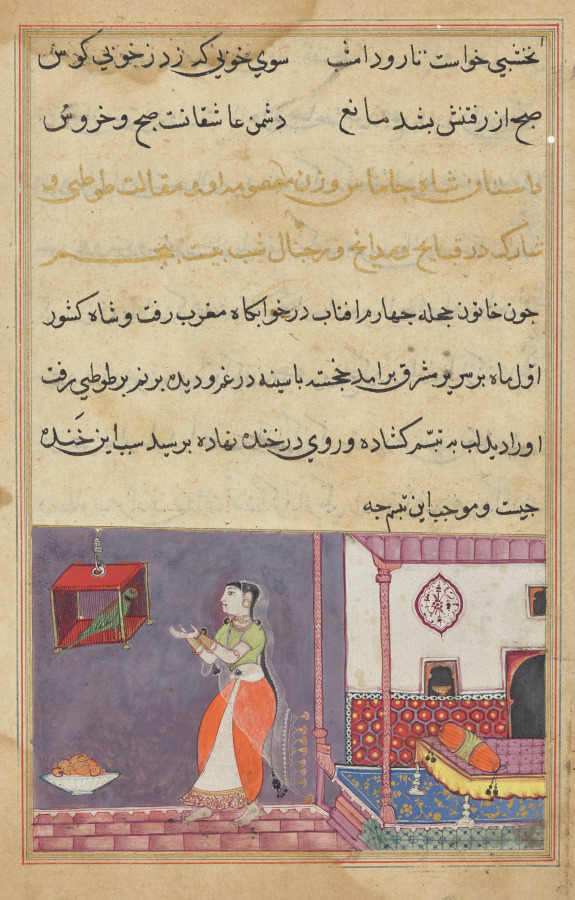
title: The Parrot Addresses Khujasta at the Beginning of the Twenty-fifth Night, from a Tuti-nama (Tales of a Parrot)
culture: Mughal India, court of Akbar (reigned 1556–1605)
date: c. 1560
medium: gum tempera, ink, and gold on paper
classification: Painting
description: Khujasta stands in front of a porch with a blue arabesque carpet and footed bed. The empty bed speaks to her loneliness and longing for a lover. She is dressed as an Indian woman, with backless blouse, orange wrapped skirt, and a long sash. The pompom fringe of her translucent, muslin stole stands out in a vertical row.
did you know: Pink sandstone was a favored building material around the region of Delhi and Agra in northern India.